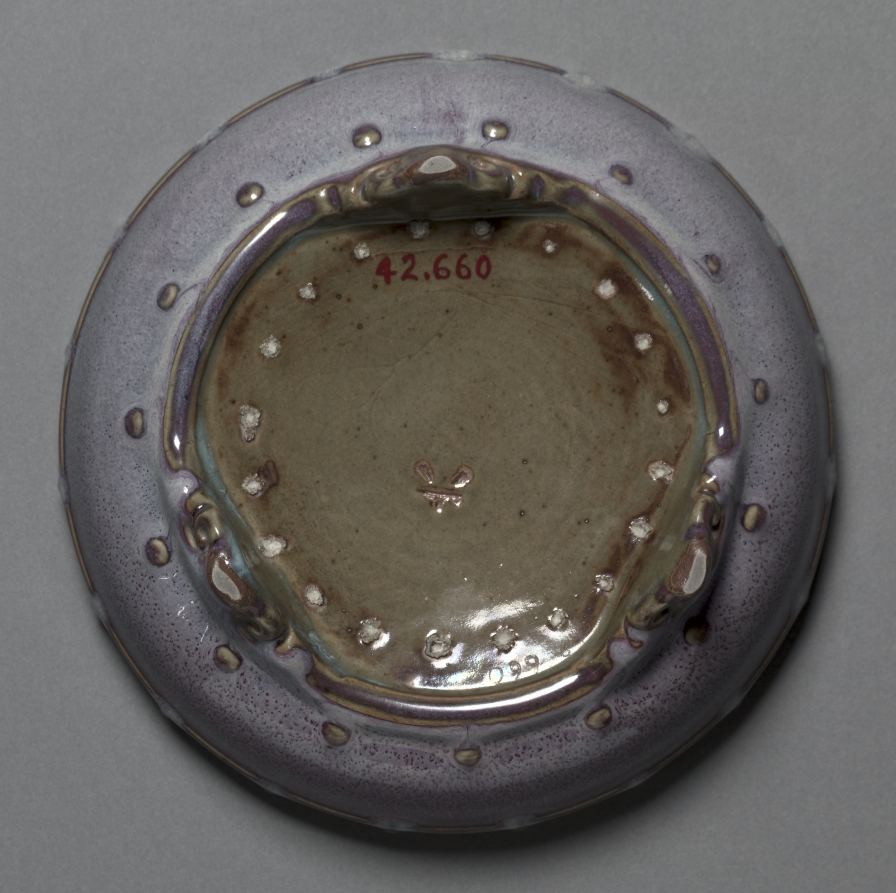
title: Bulb Bowl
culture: Northern China, Yuan dynasty (1271-1368) - Ming dynasty (1368-1644)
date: 1300s–1400s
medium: Porcelaneous stoneware, numbered Jun ware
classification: Ceramic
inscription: 六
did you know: The circle of 20 spur marks on base show where the bowl was supported during firing.